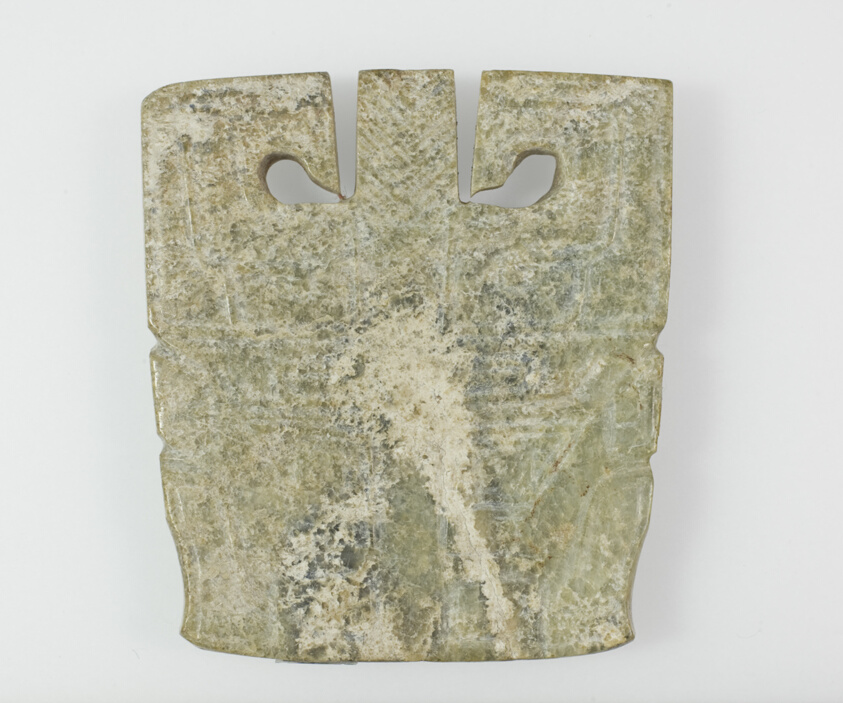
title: Pendant, animal mask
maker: China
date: Shang dynasty (c.1600–1046 BCE)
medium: Jade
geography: China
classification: jade; asian art